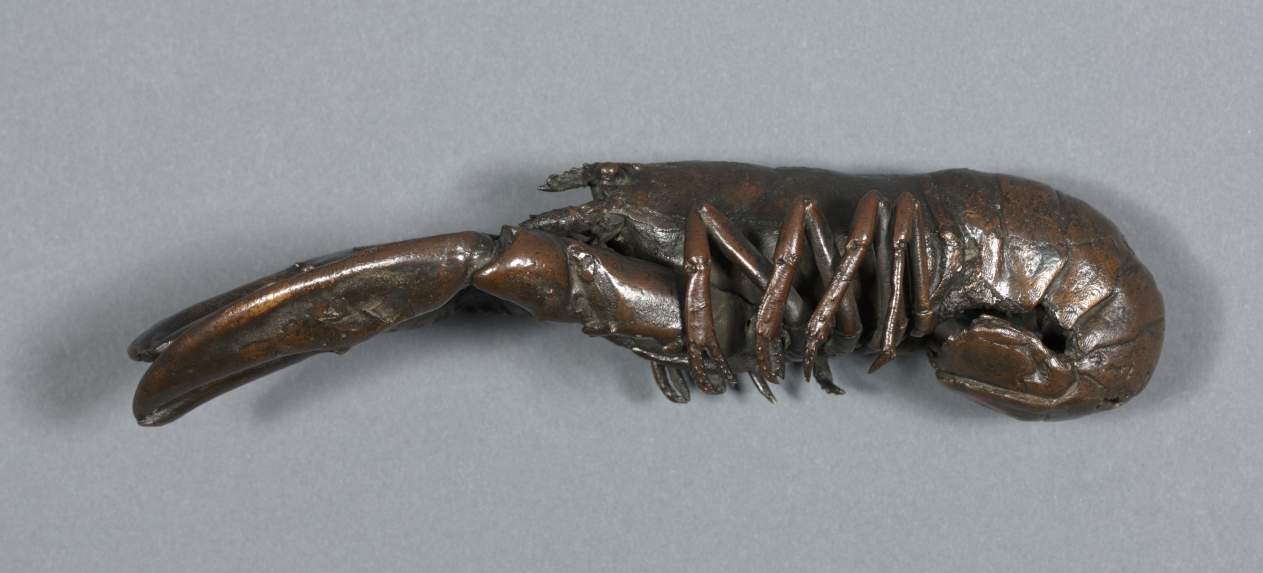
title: Lobster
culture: Italy, possibly Padua, 16th century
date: c. 1500–1550 or later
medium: bronze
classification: Sculpture